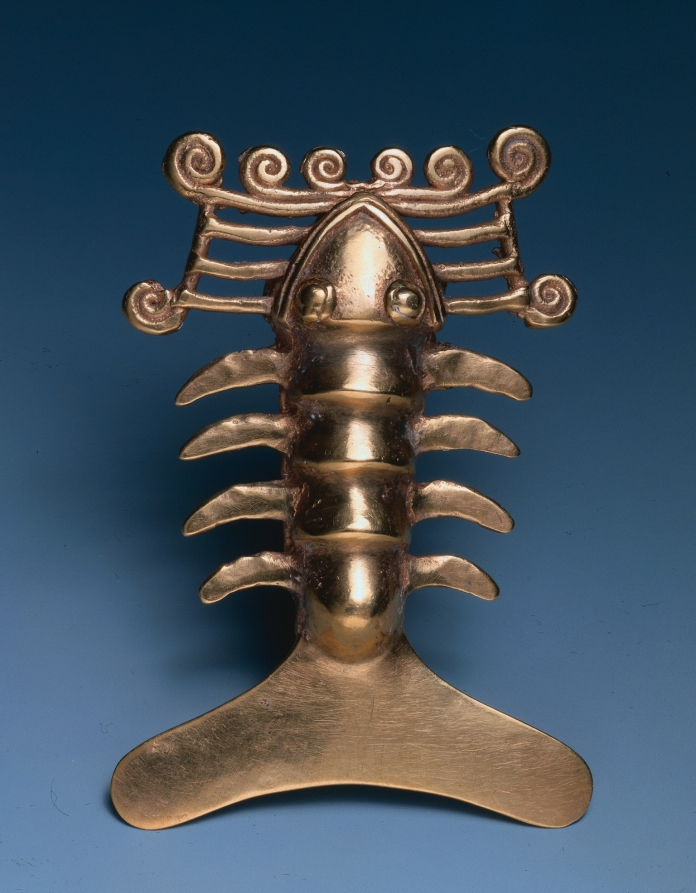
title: Lobster Pendant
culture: Costa Rica, Diquís region, 11th-16th century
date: c. 1000–1500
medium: cast gold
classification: Metalwork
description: Among the pendants shown here are a crustacean (1943.290), an animal-headed figure (1948.18), and two pendants featuring birds (1951.442 and 1946.223). The latter were dubbed aguilas (eagles) by Christopher Columbus, who saw natives wearing them as necklace ornaments. Modern researchers are not as sure of the species shown, but some believe that they are birds of prey because talons and beaks are prominent and often clutch something, in one example here a small, disembodied head that holds a clapper. In both examples, two tufts in the form of crocodiles in profile flank the birds’ heads.